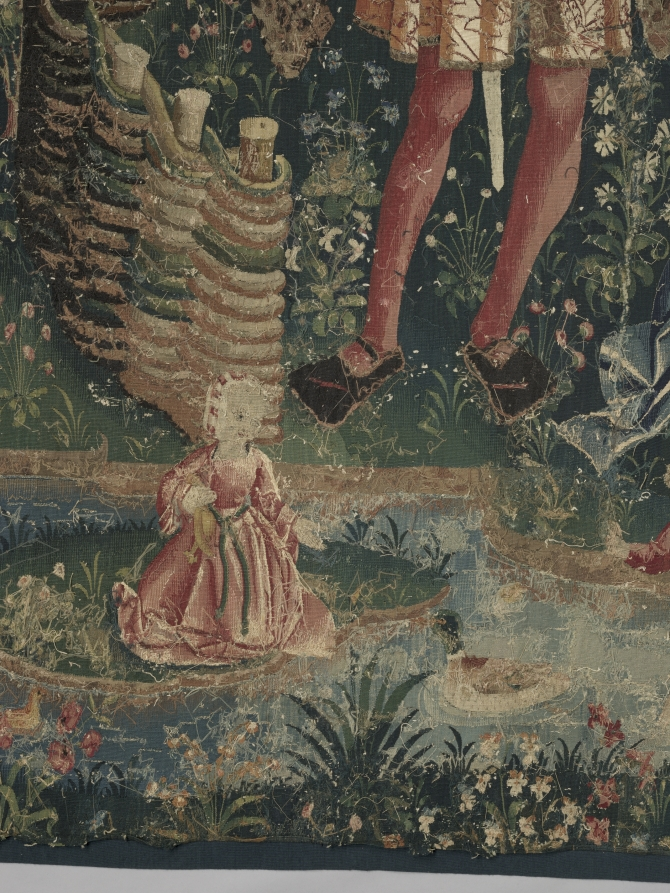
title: Time (from Chateau de Chaumont set)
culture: France, Lyon(?), early 16th century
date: 1512–15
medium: silk and wool; tapestry weave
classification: Tapestry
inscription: French verse in Gothic letters translates as follows: "One sees the weather adorned in green, Sometimes as pleasing as an angel; To suddenly change and be quite strange, The weather never stays the same."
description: Pierre Sala, who likely commissioned the set, is portrayed as the richly attired central figure offering a bouquet, a symbol of knowledge, to Éléonore, his daughter. Éléonore is pregnant, revealed by her upturned skirt and the persimmon in her husband Hector’s hand. Hector’s mother, Marguerite, in dark attire, will wed the widowed Sala in 1519. They appear in front of the royal chateau of Blois. The figures at the right convey Sala’s advice to his children. Time (the old man with the staff) with Clio, the Muse of History, standing on his shoulders, is being attacked by a Herculean youth wielding a stick. With this allegory, Sala is explaining that youth is ignorant of the complexities of life and time. The small unicorn at the far right represents the soul. The verse in Old French at the top refers to changing time: One sees Time adorned with green foliage, Sometimes as pleasant as an angel, Then suddenly change and become quite strange. Never does Time persist in one state.